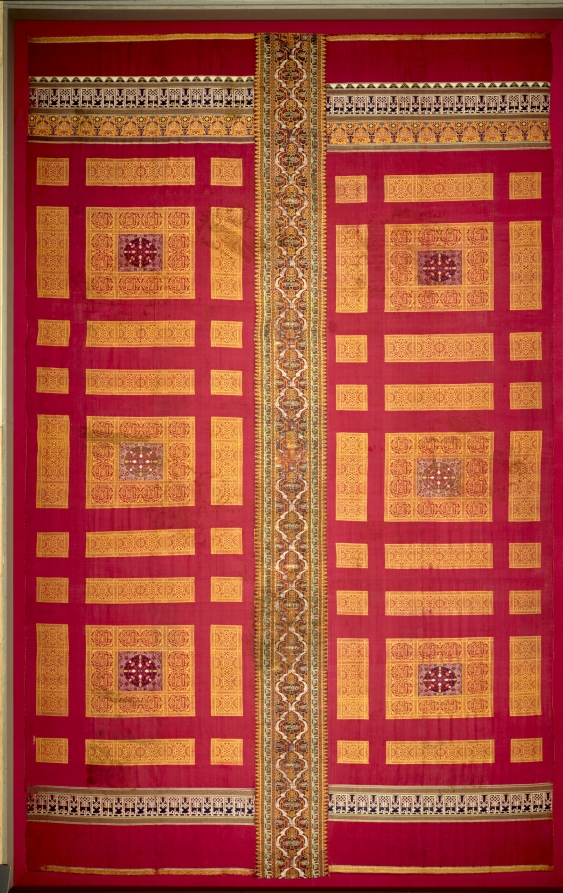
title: Silk curtain from the Alhambra palace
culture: Spain, Granada, Nasrid period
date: 1300s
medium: lampas and taqueté: silk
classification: Textile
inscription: the bold knotted Kufic inscription in the top and bottom borders of the side panels repeats the Arabic word "felicity." Within the arches forming a frieze in the top border is a Kufic inscription "good fortune" and a Naskhi inscription repeating trhe motto of the Nasrid dynasty, "There is no conqueror but God." In the borders of the three large ornamental rectangles on each side panel is the Naskhi inscription "Dominion belongs to God alone." On the central panel the inscriptions in the borders repeat the phrase, "Majestry is God's," while the Nasrid motto, "There is no conqueror but God" and, above, "Blessing," are inscribed in the arabesque ogives.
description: This is one of two of the largest, most complete, and most ornate curtains to survive from the 1300s when it presumably hung in the royal Alhambra Palace in Granada, the last Muslim stronghold in Spain. Its style, artistic vocabulary, and harmonious proportions reflect the magnificent wall decoration in the Alhambra. The motto of the ruling Nasrid dynasty, "There is no conqueror but God," is inscribed in the end borders and central panel. The inscribed striped silk forming the central panel is more worn, suggesting that it was recycled, most likely during the 1300s.